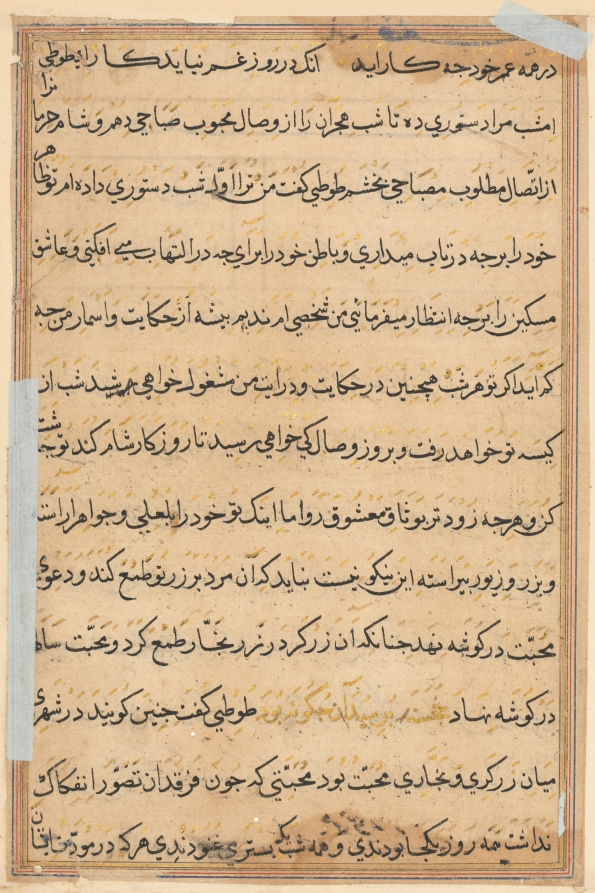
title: Page from Tales of a Parrot (Tuti-nama): text page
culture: Mughal India, court of Akbar (reigned 1556–1605)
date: c. 1560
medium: gum tempera, ink, and gold on paper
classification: Painting